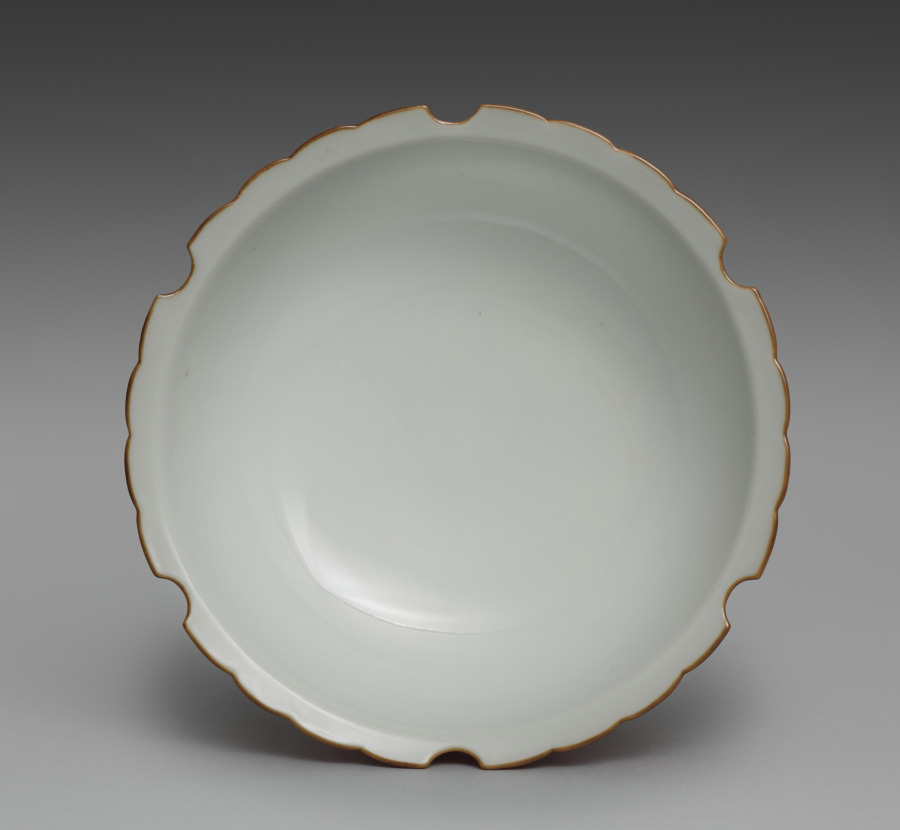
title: Dish from Snow-Flake Side Dishes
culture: Japan, Meiji period (1868–1912)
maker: Seifū Yohei III (Japanese, 1851–1914)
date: 1893–1914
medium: One from a set of six porcelain dishes; porcelain with lobed rims and pink glaze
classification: Ceramic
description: According to the box lid, this set of six side dishes, or mukōzuke, are “snow-flower style” (sekkashiki), having mouths shaped like snowflakes. Their mouths, which have six lobes and scalloped edges, are traced with brown iron oxide at the rim. The outside of each bowl is glazed with a very bright pink over the basin and foot, and the inside is left white. From directly above, one sees a snowflake-like shape, and from the side, they seem to float above a rosy ground.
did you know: The box for this set of dishes has an inscription on the side noting that they were for a person with the family name Nakamoto.